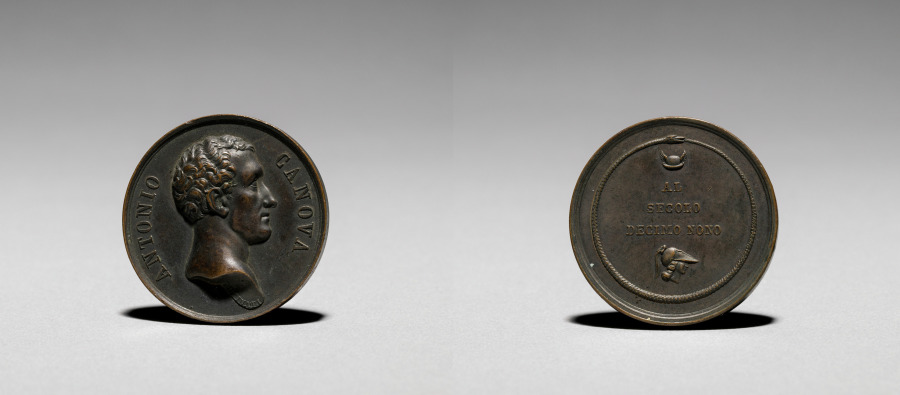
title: Medal: Antonio Canova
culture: Italy, 19th century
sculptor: Francesco Putinati (Italian, 1775–1848)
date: early-mid 1800s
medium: bronze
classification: Metalwork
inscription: "ANTONIO CANOVA"; signed: Putinati."